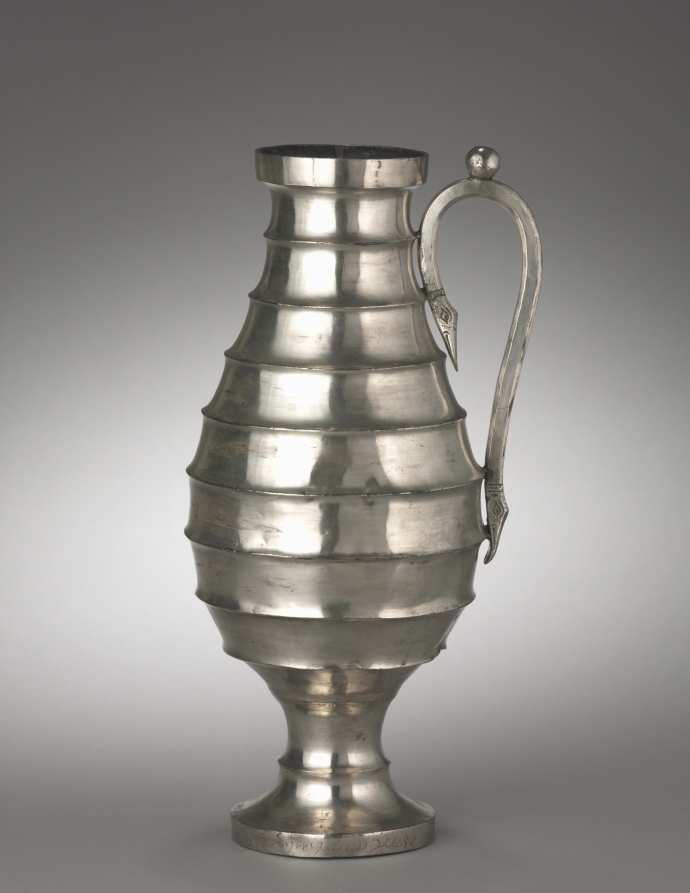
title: Stepped Pitcher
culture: Iran, Sasanian Empire (224–651 CE)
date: 400–600 CE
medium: silver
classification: Metalwork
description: The Sasanians are best known today for their expert work in silver. This museum is fortunate to have one of the most important collections of Sasanian silver vessels in the world.